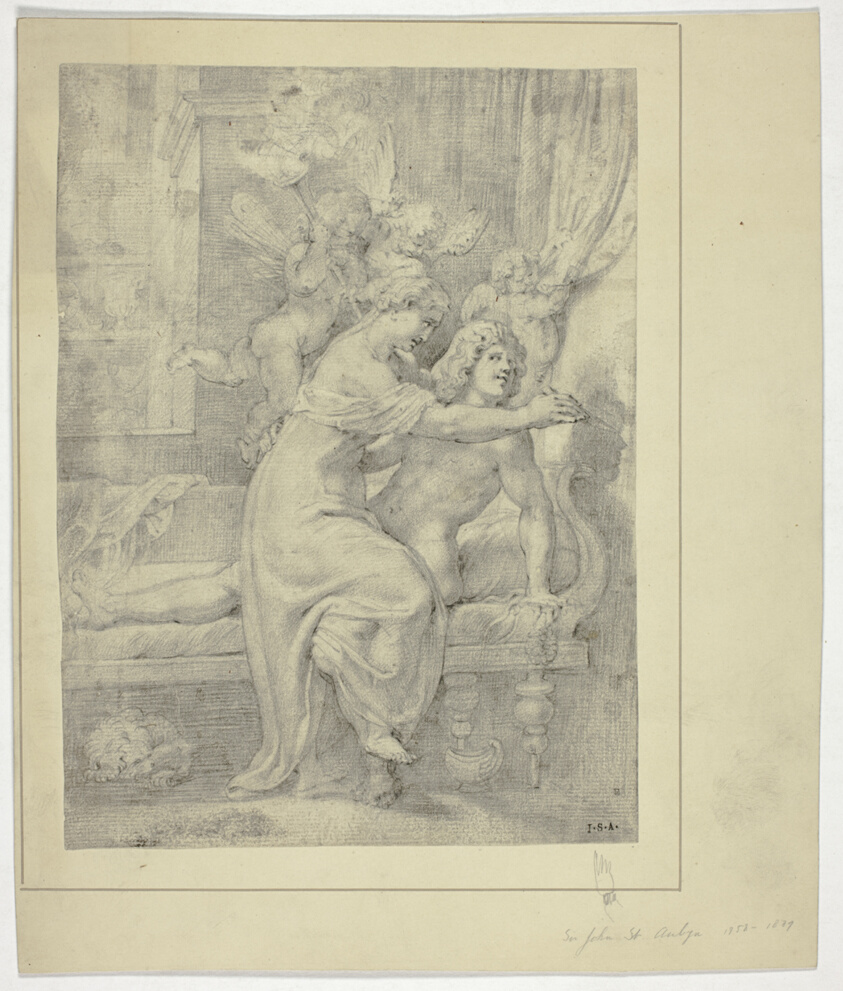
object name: Drawing and Watercolor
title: The Invention of Drawing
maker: Unknown Artist; Flemish, 17th-18th centuries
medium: Graphite on ivory laid paper, laid down on card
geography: Flanders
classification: chalk; drawings (visual works); prints and drawing